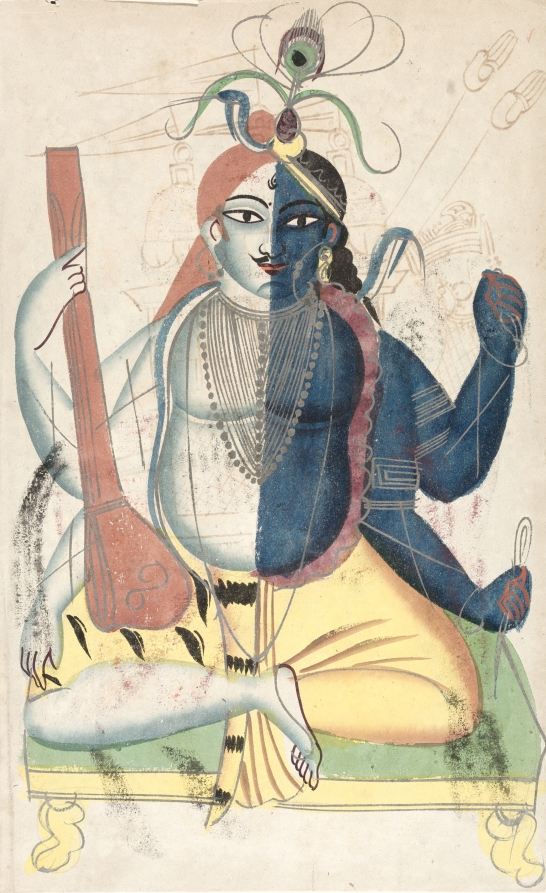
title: Vasudeva (Krishna's Father) Fleeing with Krishna Encounters a Cobra and a Jackal (verso), from a Kalighat album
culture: Eastern India, Bengal, Kolkata, Kalighat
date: c. 1890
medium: Gum tempera, graphite, ink, and tin on paper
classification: Painting